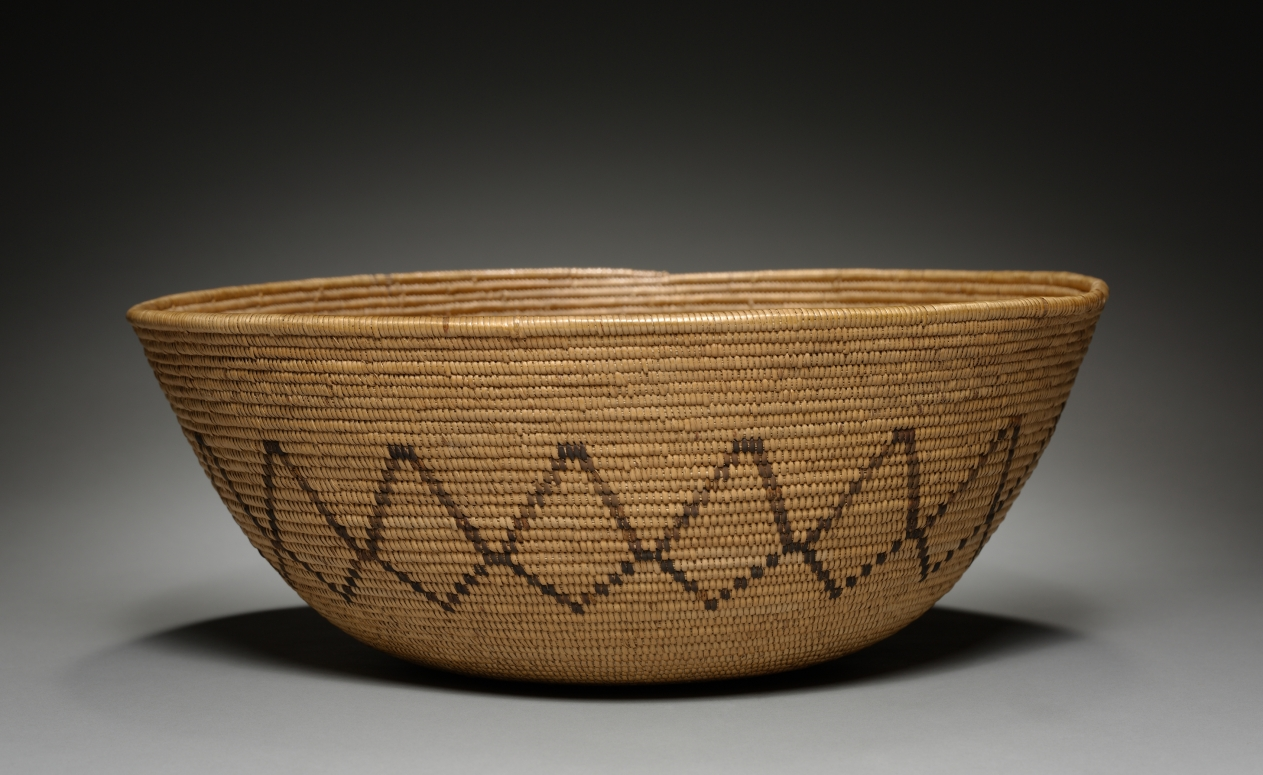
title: Bowl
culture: California, Southern, Gabrielino (San Gabriel, Mission or Tongva), Late 19th- Early 20th century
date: c 1875– 1925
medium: coiled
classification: Basketry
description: CMA Bulletin, December 1930